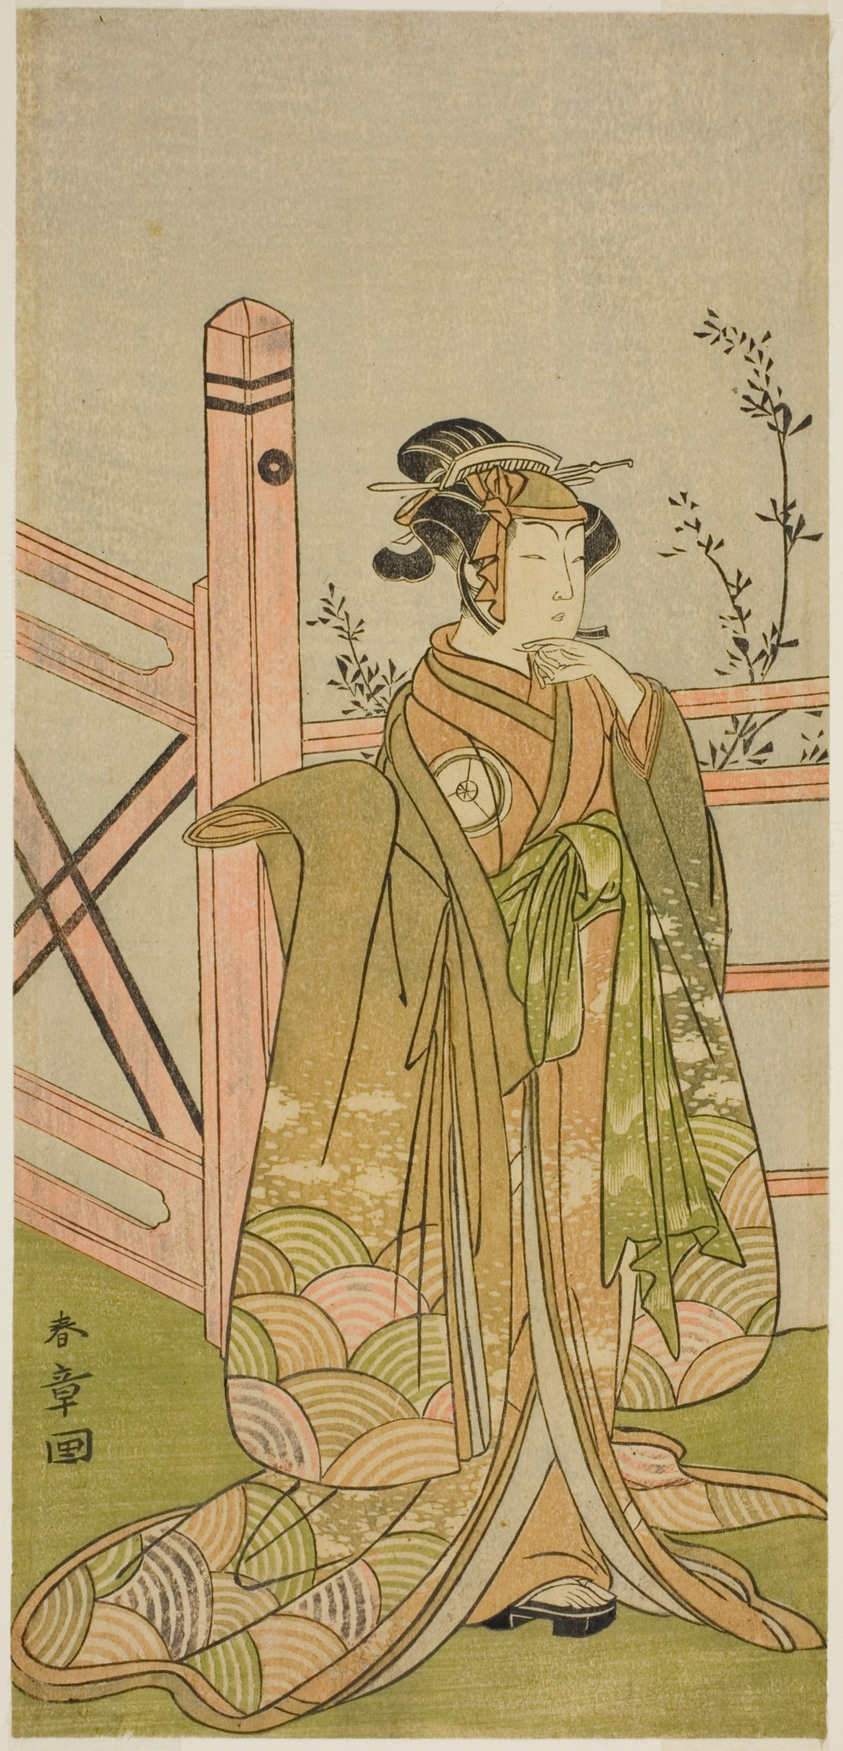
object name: Print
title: The Actor Iwai Hanshiro IV in an Unidentified Role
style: Japanese (culture or style)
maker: Katsukawa Shunsho 勝川 春章; Japanese, 1726-1792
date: c. 1772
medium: Color woodblock print; hosoban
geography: Japan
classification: woodblock print; print; asian art